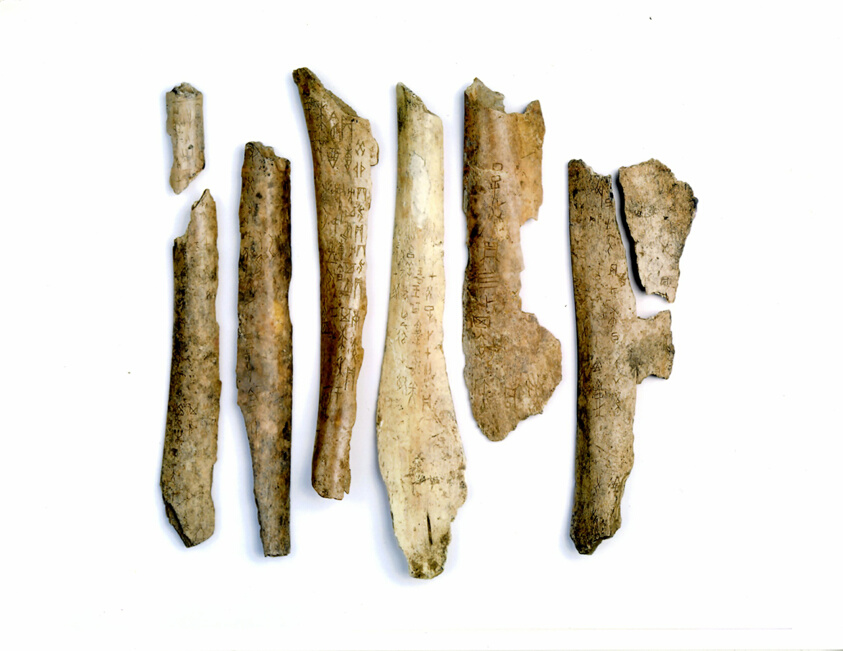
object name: Religious/Ritual Object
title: Oracle Bones (76 total)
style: Chinese (culture or style)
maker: China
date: Shang dynasty (about 1600–1046 BC)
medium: Segments of turtle plastrons and bones of oxen; polished, burned, and carved with inscriptions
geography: China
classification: ritual objects